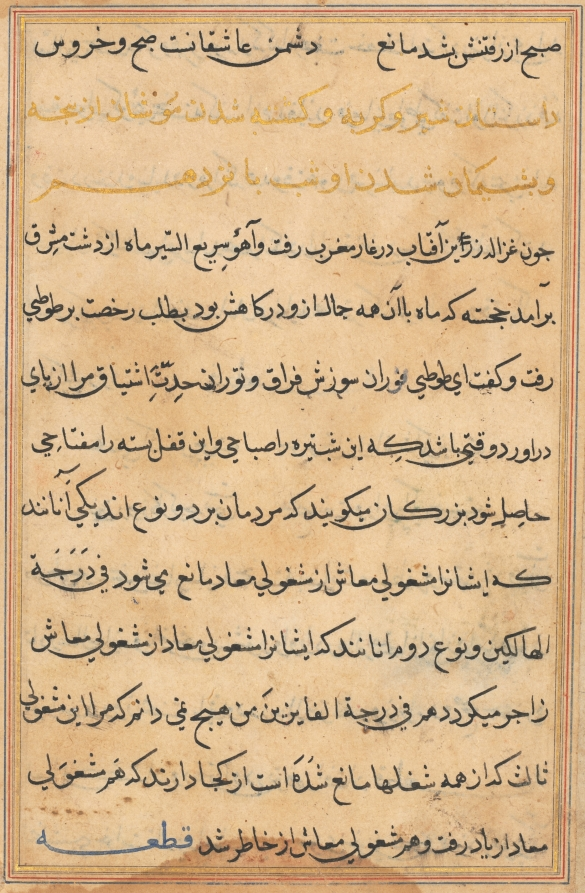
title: Page from Tales of a Parrot (Tuti-nama): text page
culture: Mughal India, court of Akbar (reigned 1556–1605)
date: c. 1560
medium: gum tempera, ink, and gold on paper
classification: Painting